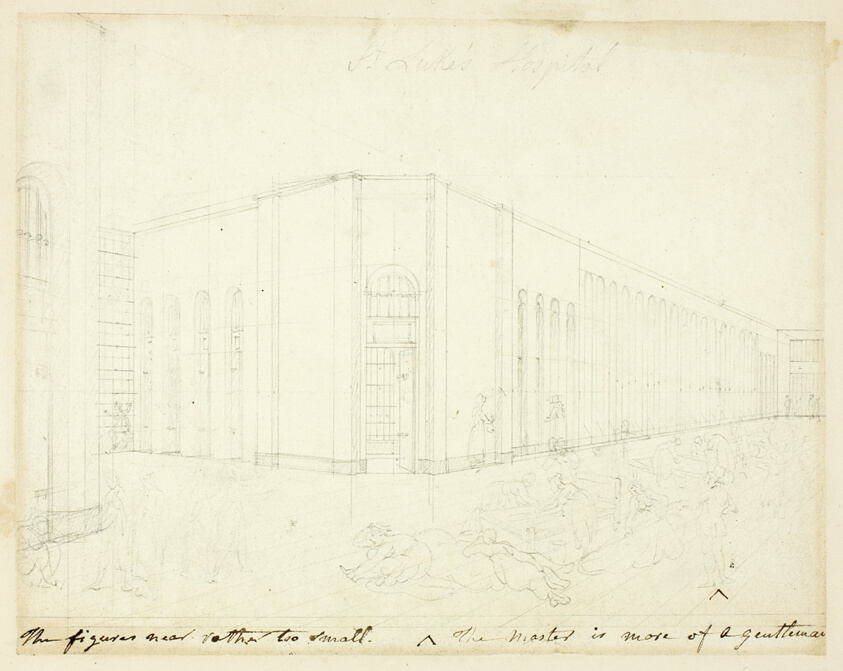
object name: Drawing and Watercolor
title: Study for St. Luke's Hospital, from Microcosm of London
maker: Augustus Charles Pugin (English, born France, 1762-1832); Thomas Rowlandson (English, 1756-1827)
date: c. 1809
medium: Graphite on ivory wove paper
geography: England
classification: graphite; drawings (visual works); prints and drawing